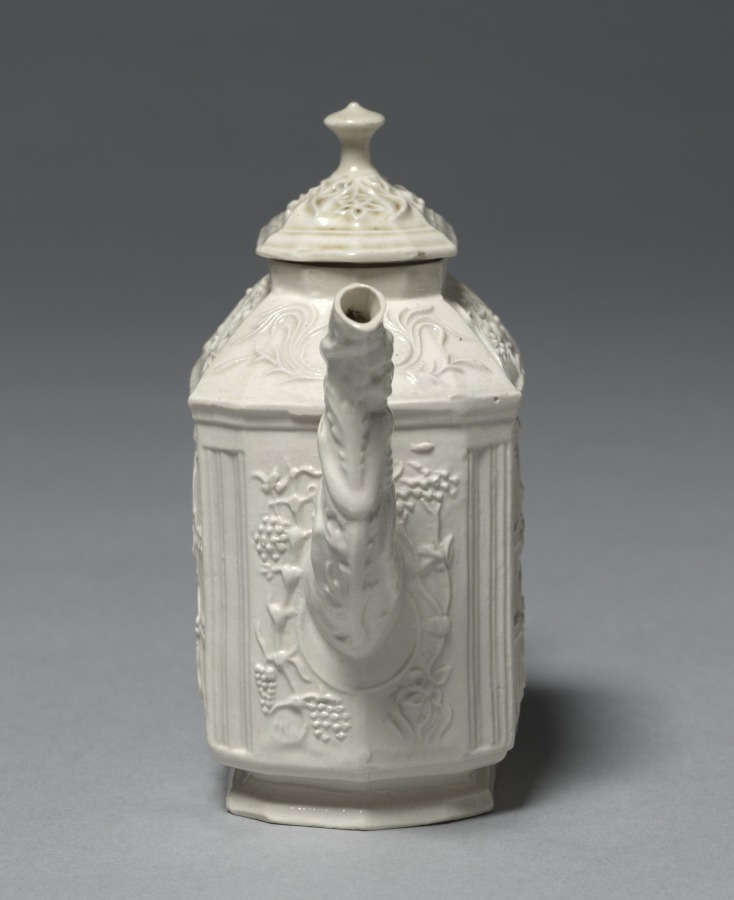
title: Teapot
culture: England, Staffordshire, 18th century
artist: Staffordshire Factory (British)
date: c. 1745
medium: salt-glaze earthenware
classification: Ceramic